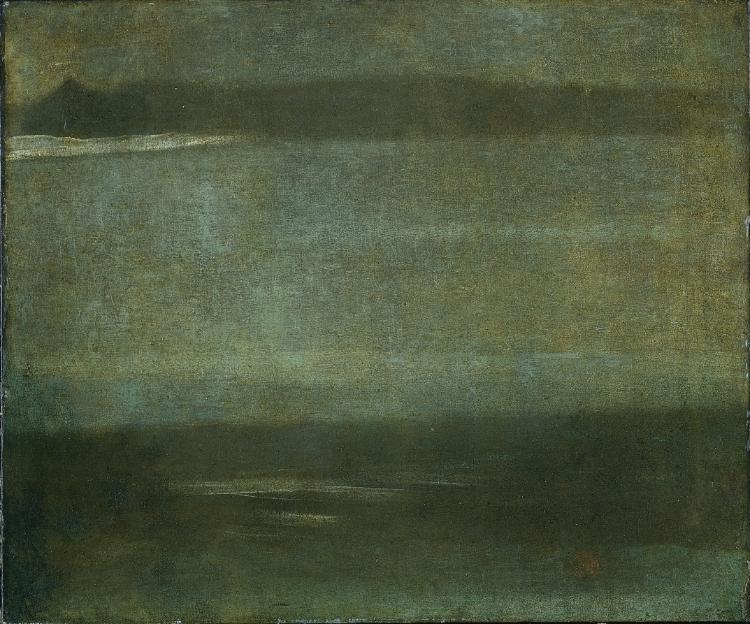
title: Gray and Silver: A Nocturne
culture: England, 19th century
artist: Walter Greaves (British, 1841–1930)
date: c. 1880–1900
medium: oil on canvas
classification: Painting